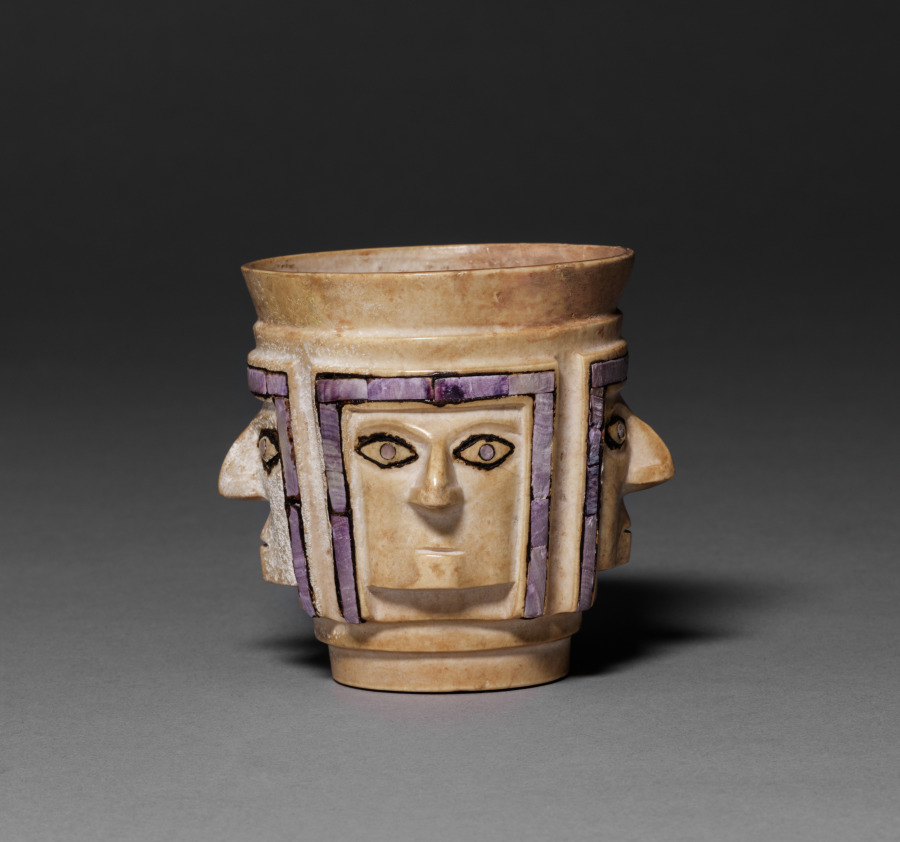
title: Cup with Four Faces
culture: Central Andes, Wari people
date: 600–1000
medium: Stone with shell inlay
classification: Stone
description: The identity of the four, wide-eyed faces on this cup is unknown. Equally mysterious is the cup’s function. It seems too small to be used for drinking beer at the feasts the Wari sponsored to put others in their debt. The size may suggest the cup was used in more intimate circumstances, perhaps to make libations to sacred forces that animated the ancient landscape.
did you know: The inlay is made of spondylus (thorny oyster) shell, a form of wealth in antiquity.